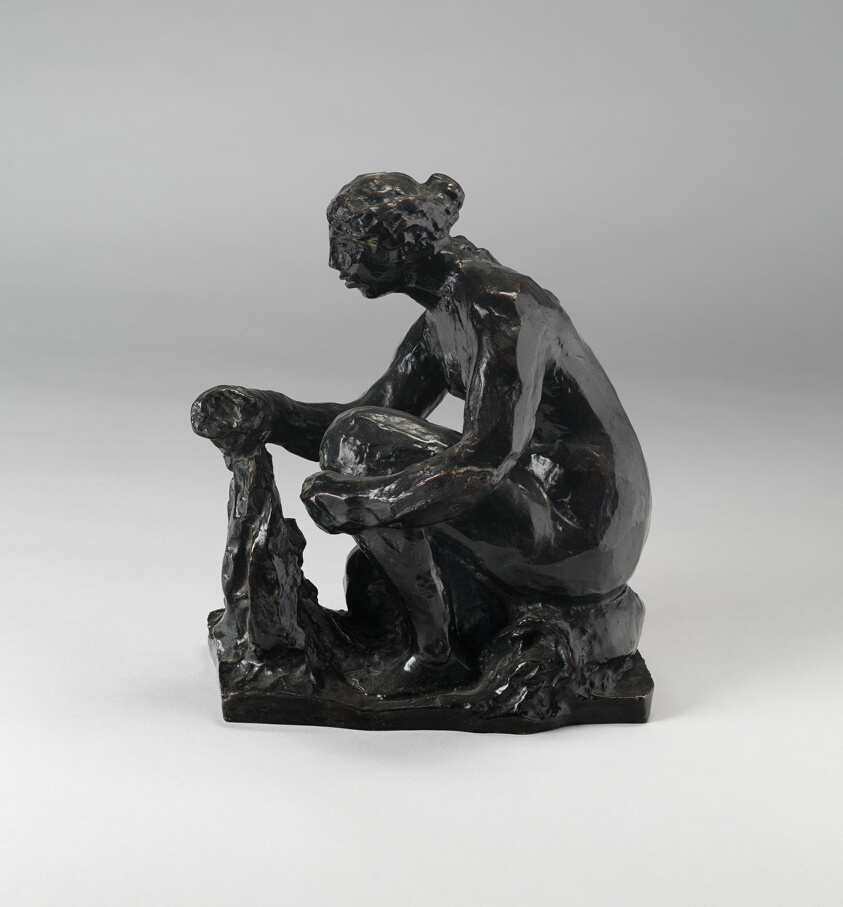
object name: Sculpture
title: Water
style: Impressionism, 19th century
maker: Pierre-Auguste Renoir (French, 1841–1919); Ricard Guino (Spanish, 1890–1973)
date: 1916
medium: Bronze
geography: France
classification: sculpture; bronze; european decorative arts; french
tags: women, bronze (color), sculpture, nudes, work, water